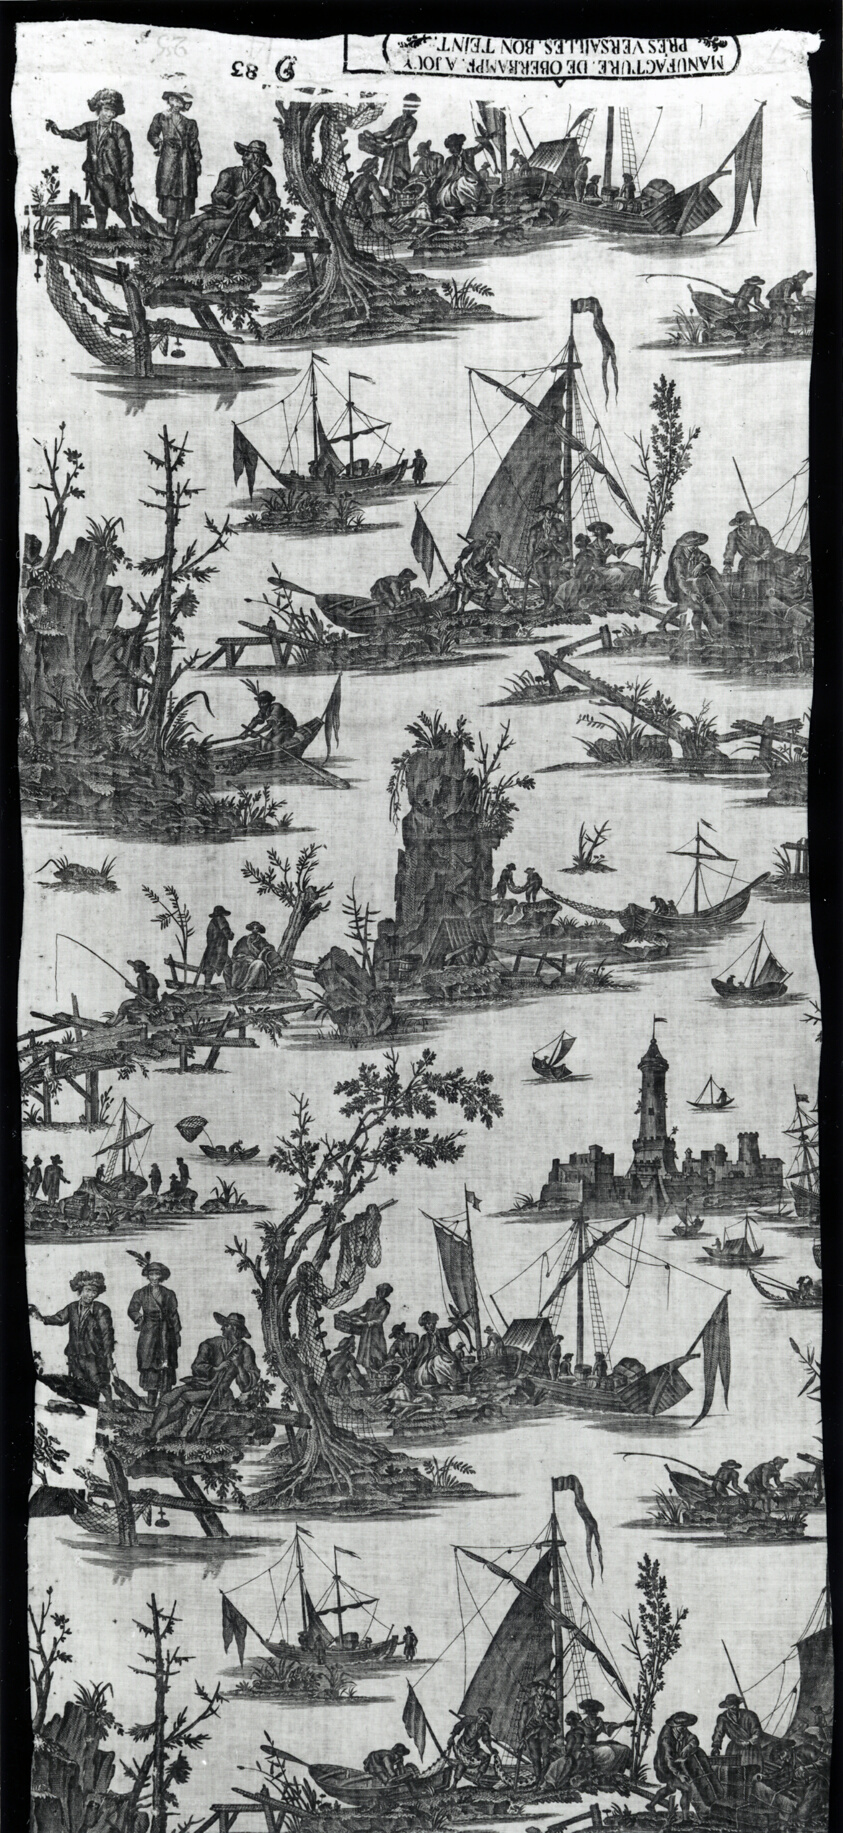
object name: Textile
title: La Péche et la Commerce Maritime (Fishing and Maritime Trade) (Furnishing Fabric)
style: jouy-en-Josas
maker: Engraved by Jean Jacques Le Veau (French, 1729-1785) and others after Claude Joseph Vernet (French 1714-1789) and others; Manufactured by Christophe-Philippe Oberkampf (naturalized French, 1738-1815), Oberkampf Manufactory (French, 1760-1843); Jouy-en-Josas, France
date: c. 1780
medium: Cotton, plain weave; copperplate printed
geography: Jouy-en-Josas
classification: textile; weaving - printed; furnishing textile